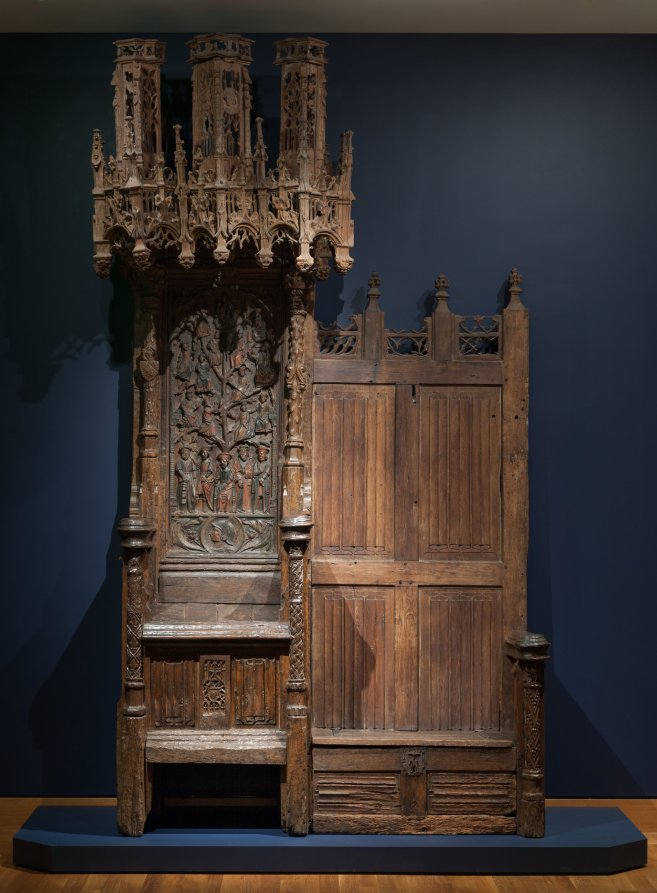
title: Abbot's Stall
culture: France, perhaps Artois or Picardy, early 16th century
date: c. 1500–1515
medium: oak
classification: Furniture and woodwork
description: This elaborate chair most likely belonged to an abbot, the spiritual head of a monastery. The seat was built high in order to raise the abbot above those surrounding him as a symbol of his rank and authority, while the canopy above accentuated his importance and dignity. The stall would have been likely placed in a monastic chapter house where the entire community of monks would have held their daily meetings and deliberations. The linen-fold panels, the intricate ribbed vaulting, the open work tracery, and the many pinnacles are characteristic of the flamboyant Gothic style at the end of the Middle Ages in France and the Low Countries. The decorative profile heads suggest some knowledge of early Renaissance models. The fine relief on the seat back with the Tree of Jesse shows the ancestry of Christ. The stall has received some replacement parts in recent centuries, but the seat and canopy are entirely original.